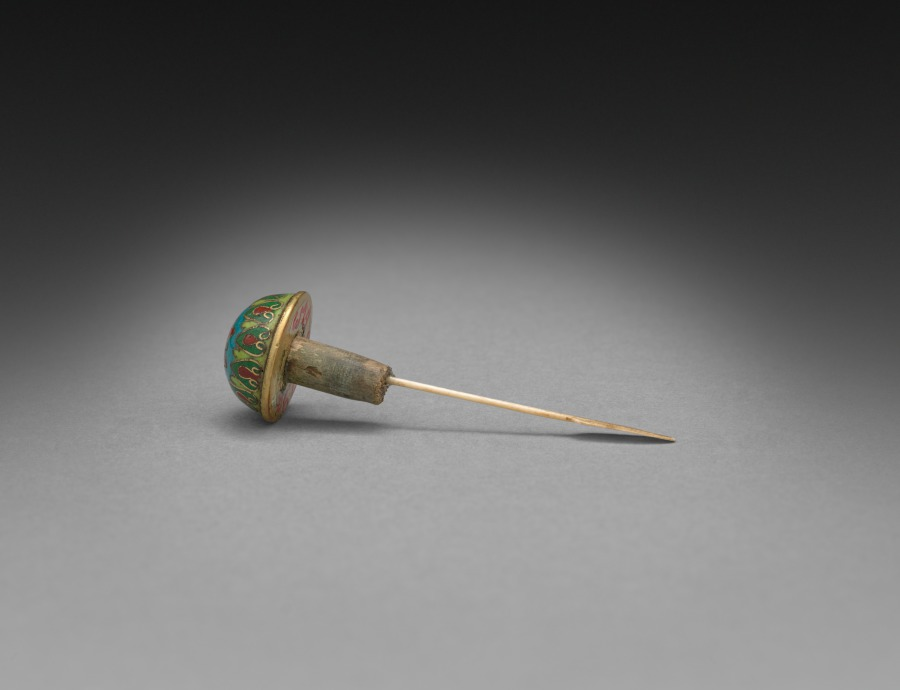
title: Snuff Bottle with Floral Scrolls (stopper)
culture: China, Qing dynasty (1644-1911), Qianlong mark and reign (1736-95)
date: 1736–95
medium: cloisonné enamel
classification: Enamel